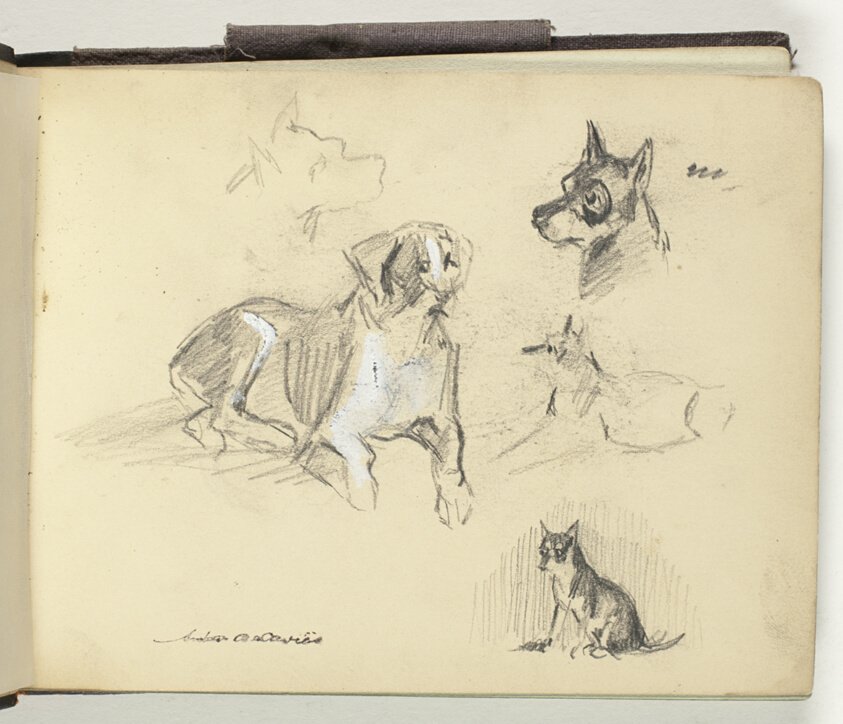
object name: Drawing and Watercolor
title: Sketchbook I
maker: Arthur B. Davies (American, 1862-1928)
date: 1883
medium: Maroon buckram cover, tinted paper pages with designs in graphite and watercolor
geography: United States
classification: sketchbook; graphite; prints and drawing; paper